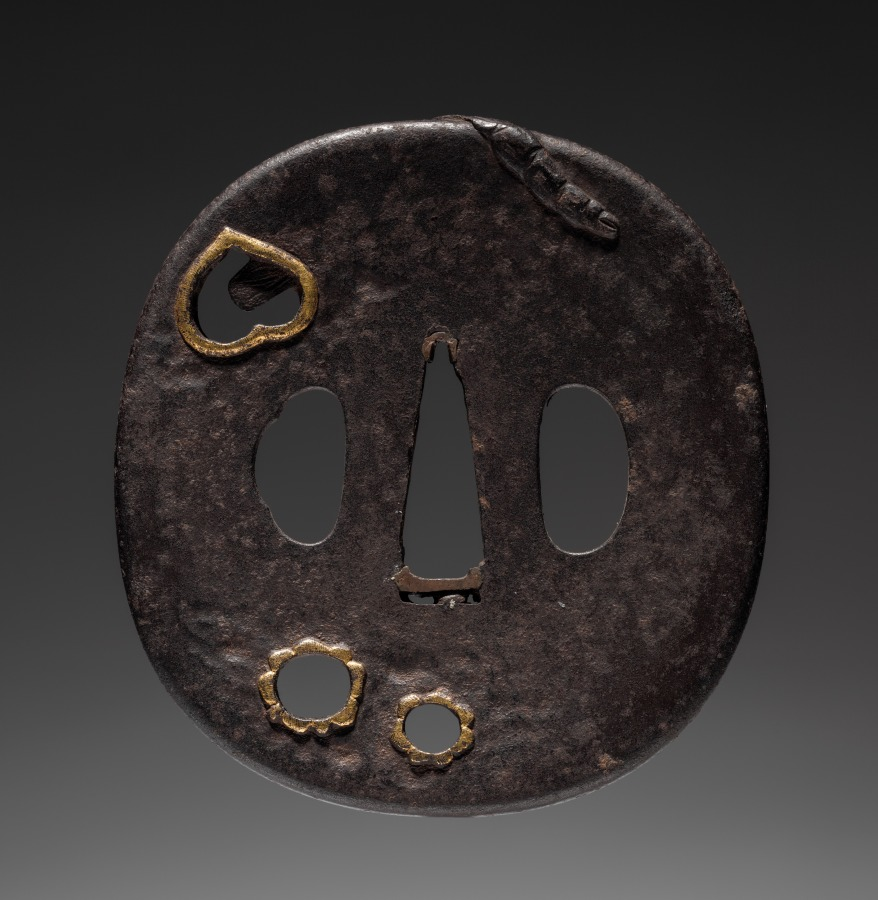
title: Sword Guard (Tsuba) with Dragonfly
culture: Japan, possibly Edo period (1615–1868)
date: c. 1615–1868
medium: metal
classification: Arms and Armor